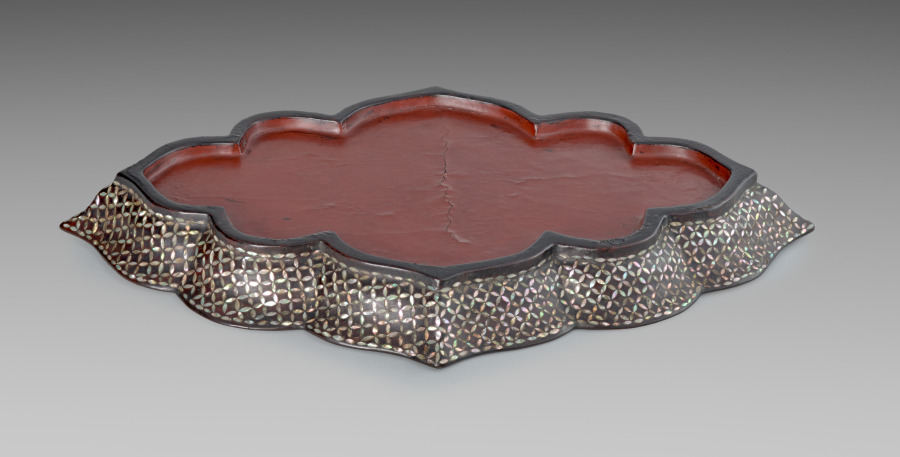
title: Foliate-Shaped Tray with Mother-of-Pearl Inlay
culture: Korea, Joseon dynasty (1392–1910)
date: late 1400s–early 1500s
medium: Inlaid abalone shells on black lacquer ground, applied with red lacquer on the interior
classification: Lacquer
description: Since the Goryeo dynasty, Korean mother-of-pearl lacquerware has been admired for its refinement, though few early examples survive. This tray, datable to the late 1400s or early 1500s, is exceptional for both rarity and condition. Its foliate form, peony vine motif, and intricate lattice border—originally derived from Goryeo-period decorative arts—are exquisitely reinterpreted through the refined craftsmanship of early Joseon artisans.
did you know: This tray’s intricately decorated surface was created through a labor-intensive inlay technique employing thin, precisely cut abalone shell.